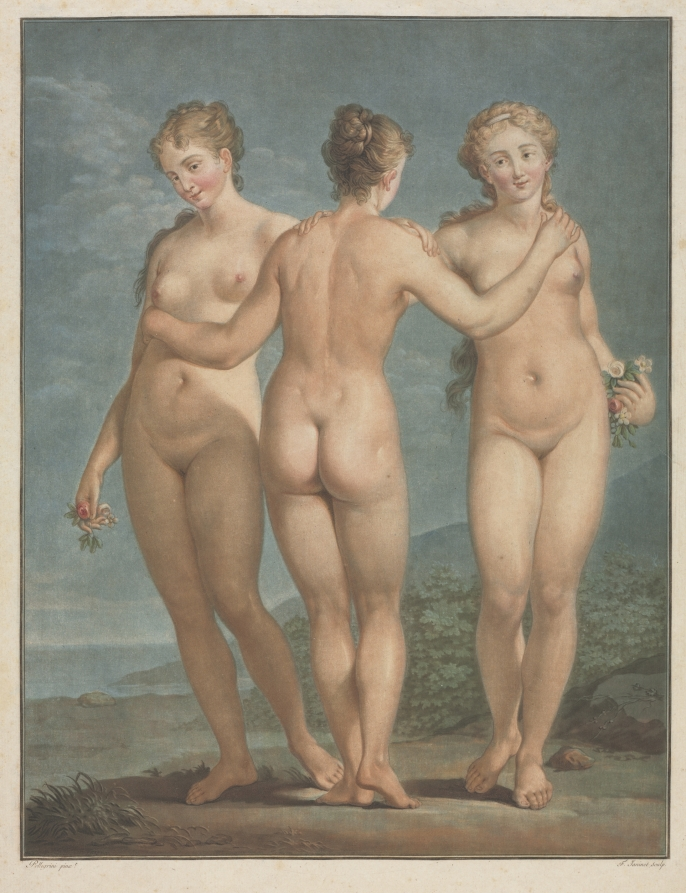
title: The Three Graces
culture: France, 18th century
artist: Jean François Janinet (French, 1752–1814)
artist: after Giovanni Antonio Pellegrini (Italian, 1675–1741)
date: 1786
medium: Color wash-manner etching and engraving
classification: Print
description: Since ancient times, art critics had praised painters for their ability to portray subjects so lifelike that they might be mistaken for the real thing. The mastery of printing techniques that produced full-color images like this one featuring female nudes with remarkably naturalistic skin gave French printmakers new capabilities that for centuries had been the exclusive domain of painters.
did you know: In addition to his work in printmaking, Jean-François Janinet was an amateur physicist and experimented with traveling by hot air balloon.